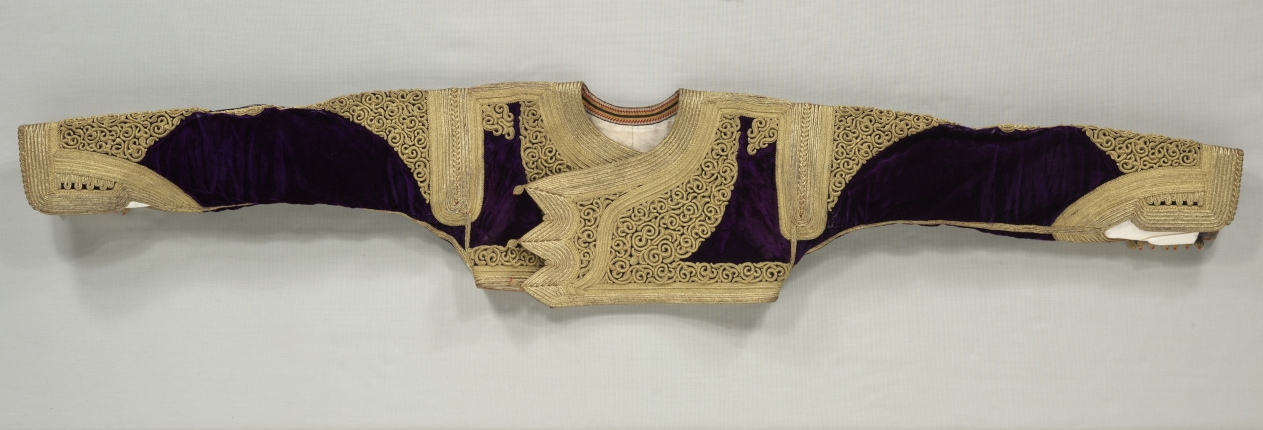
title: Women's Jacket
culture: Turkey ?, late 19th century (?)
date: late 19th century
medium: velvet decorated with gold twisted cords; modern cotton lining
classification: Garment